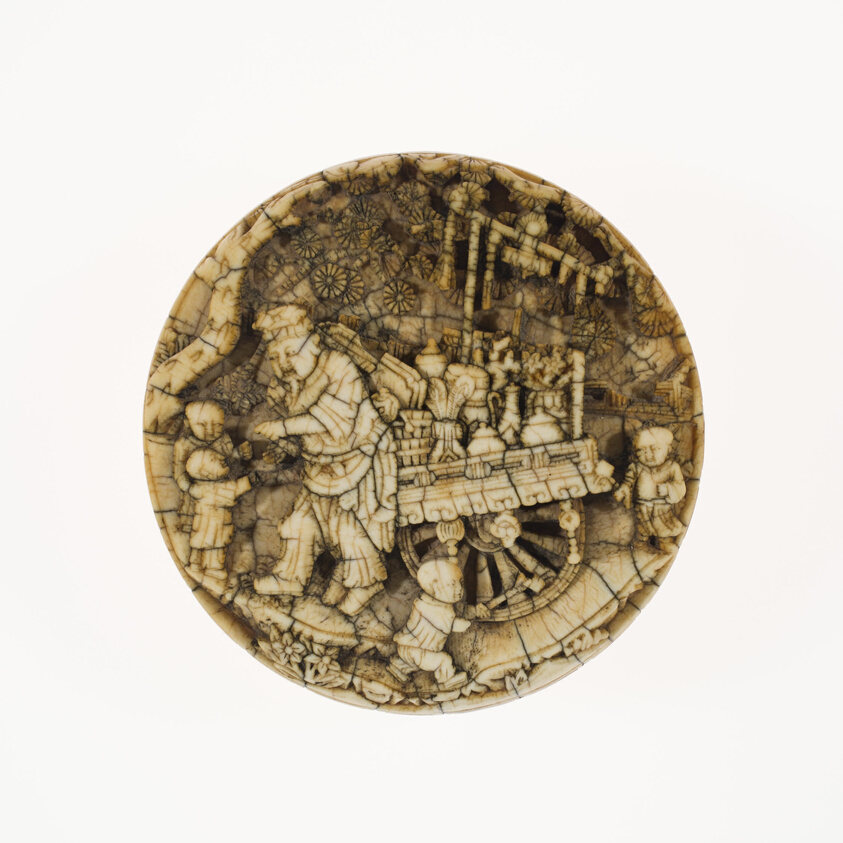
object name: Decorative Arts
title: The Knickknack Peddler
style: Chinese (culture or style)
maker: China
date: Ming dynasty (1368–1644), 16th century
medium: Ivory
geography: China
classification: ivory; sculpture; asian art; decorative arts